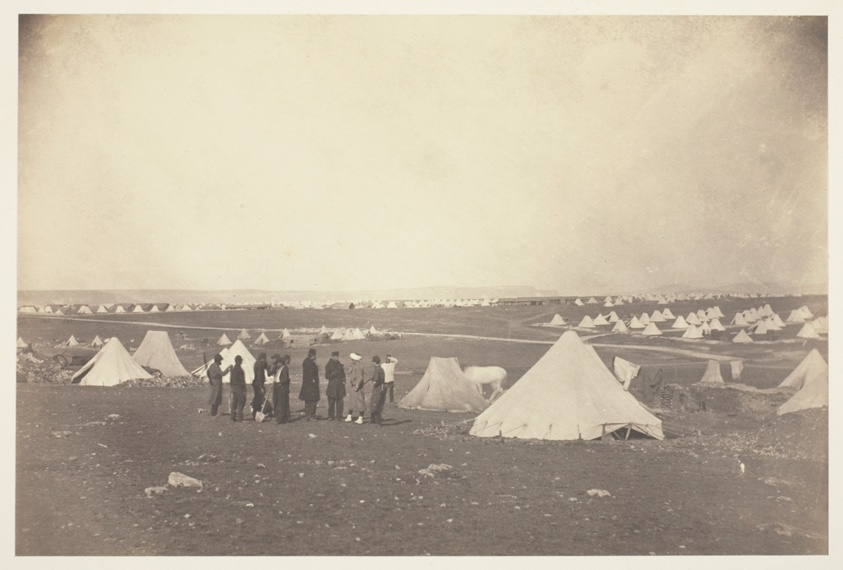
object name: Photograph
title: General Bosquet's Quarters looking toward Mackenzie Farm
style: 19th century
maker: Roger Fenton (English, 1819–1869)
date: 1855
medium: Salted paper print, from the album "Photographic Pictures of the Seat of War in the Crimea" (1856)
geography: England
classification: salted paper print; photographic process; photography; photograph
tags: Collected by Hugh Edwards